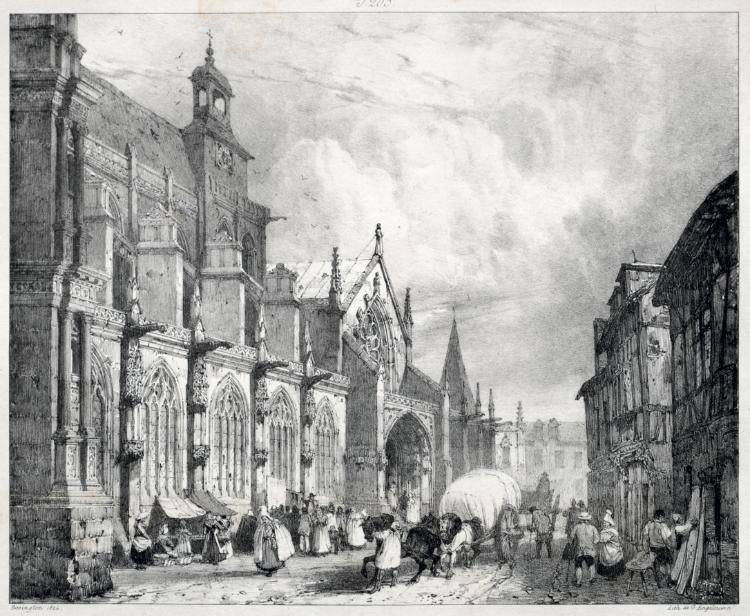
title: Voyages pittoresques et romantiques dans l'ancienne France, Normandie: Église de Saint Gervais et Saint Protais à Gisors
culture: England, 19th century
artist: Richard Parkes Bonington (British, 1802–1828)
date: 1824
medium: lithograph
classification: Print